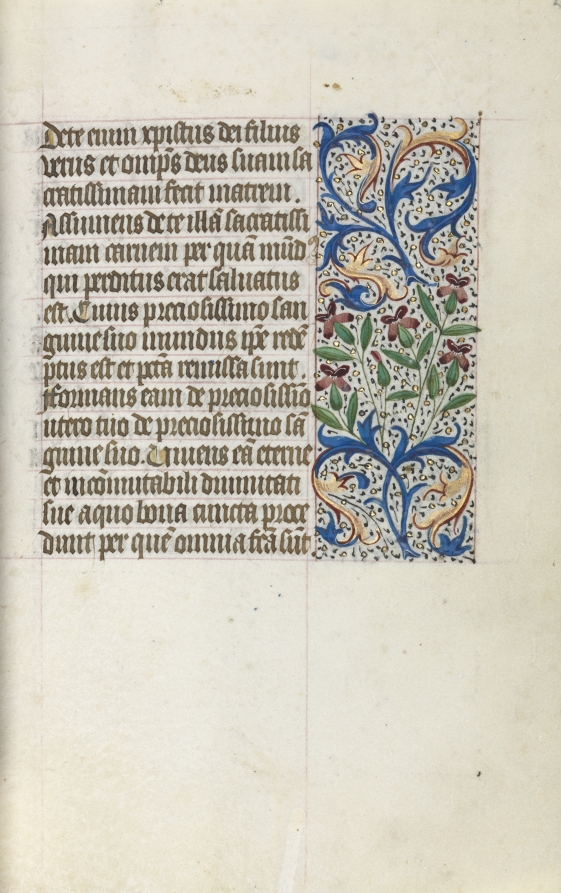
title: Book of Hours (Use of Rouen): fol. 23r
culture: France, Rouen, 15th century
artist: Master of the Geneva Latini (French, active Rouen, 1460–80)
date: c. 1470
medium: ink, tempera, and gold on vellum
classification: Bound Volume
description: In the late 1400s and early 1500s Rouen was an established and important center of book production. The city’s cathedral had a wealthy chapter that spent large sums of money to commission books and to maintain its extensive library. The stationers and booksellers would have likely been concentrated in or near the cathedral precinct. This artist, named after a manuscript now in Geneva, was Rouen’s principal illuminator during the second half of the 1400s.